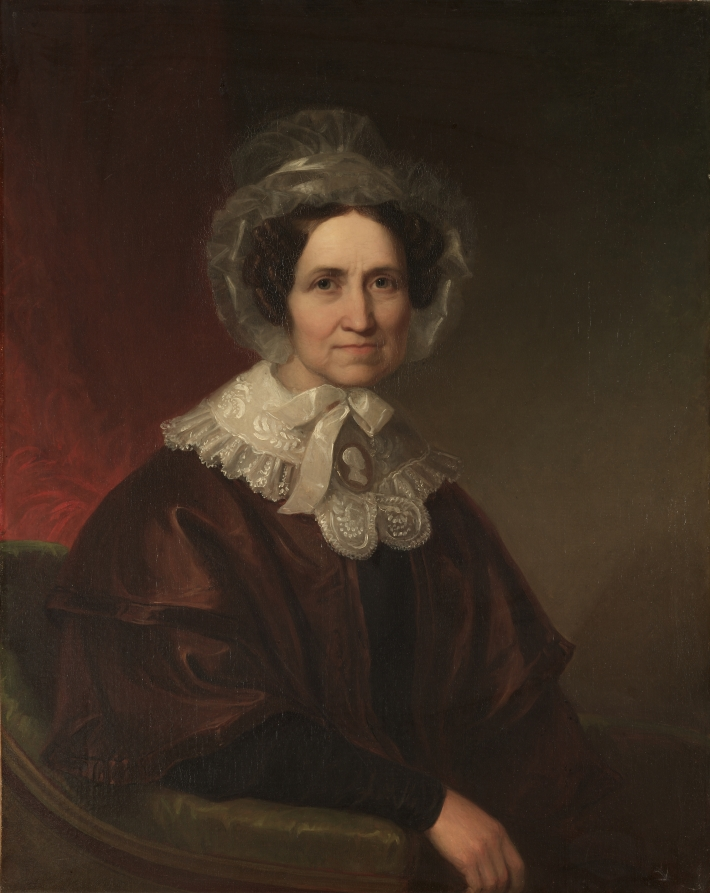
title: Sarah Eliot Scoville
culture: America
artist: Asher B. Durand (American, 1796–1886)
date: 1830s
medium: oil on canvas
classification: Painting